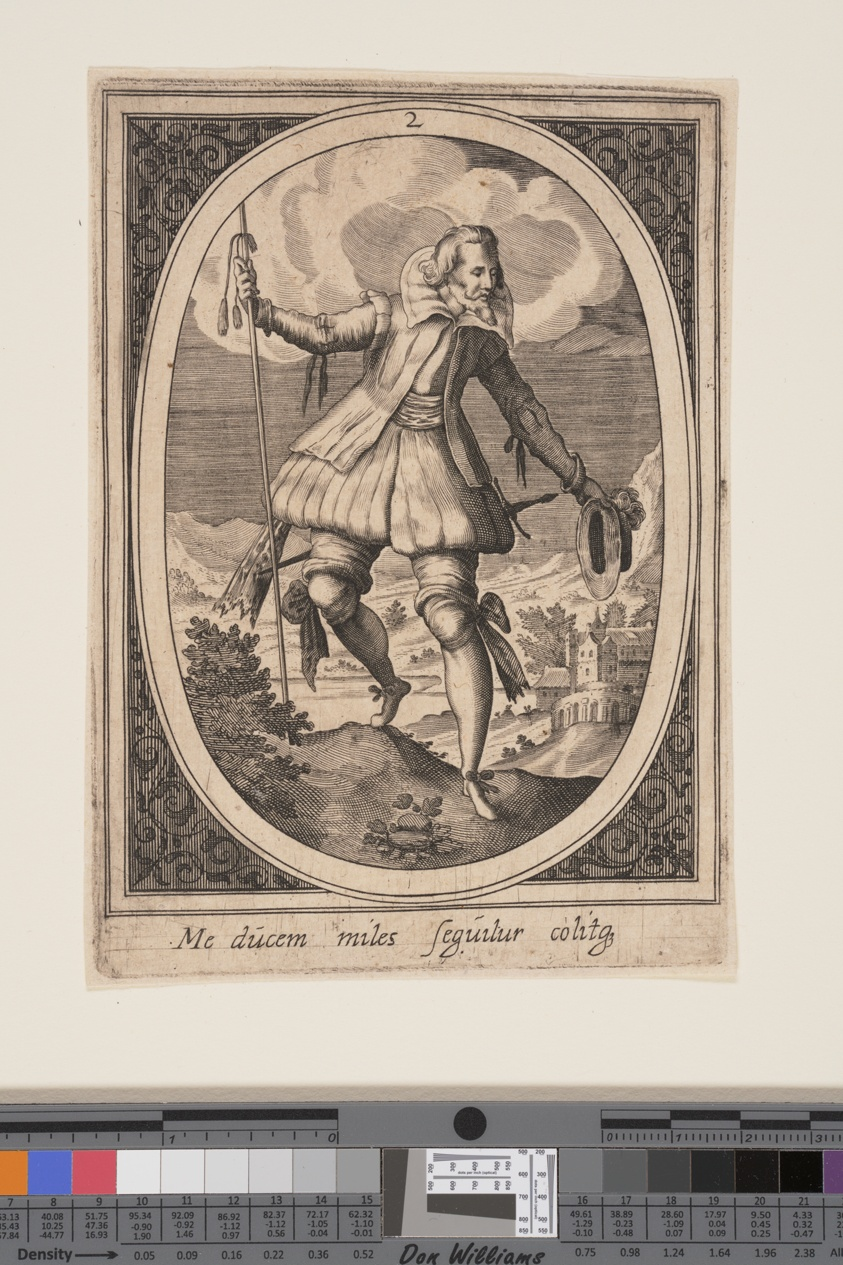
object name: Print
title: Plate 2 from Military Figures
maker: Attriuted to Heinrich Ulrich (German, c. 1572-1621); possibly after Paul Mair (German, active c. 1600)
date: c. 1590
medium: Engraving on ivory laid paper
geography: Germany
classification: engraving; paper; print; prints and drawing